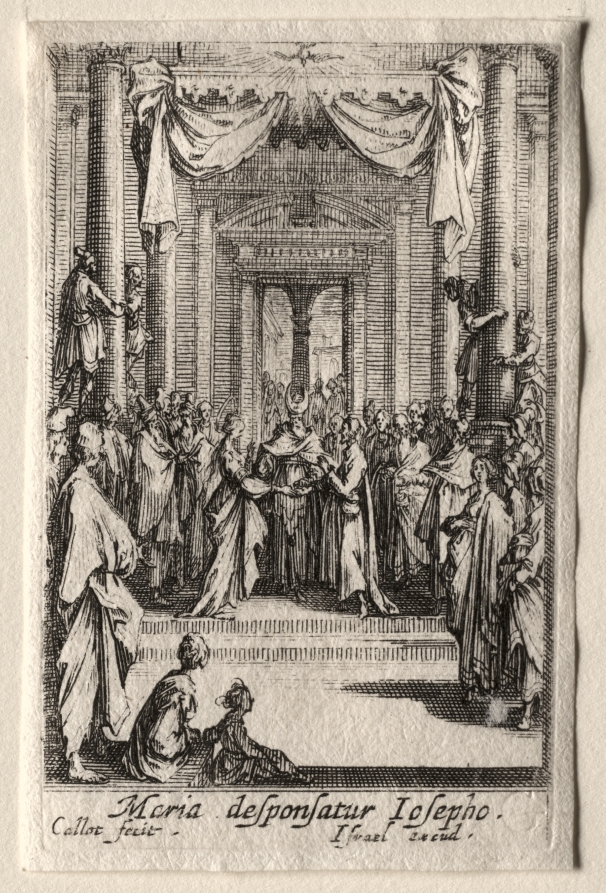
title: The Life of the Virgin: The Marriage of the Virgin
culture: France, 17th century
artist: Jacques Callot (French, 1592–1635)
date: ca. 1633–34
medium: etching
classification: Print